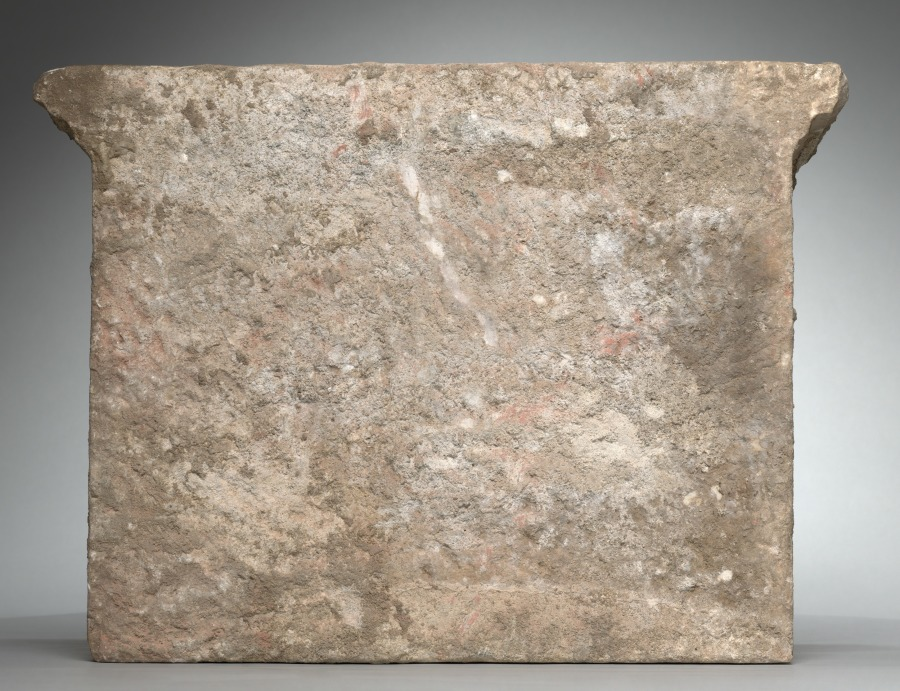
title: Engaged Capital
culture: Southern France, Abbey of Larreule, near Tarbes, 15th century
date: 1400s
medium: limestone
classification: Sculpture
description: This capital belongs to a surviving group including other architectural fragments that once decorated the cloister of the Abbey of Larreule. A cloister was a covered walkway or arcade, usually around all four sides of a square area of grass (the "cloister garth"). The seclusion of the cloister was the monks’ exclusive domain, off limits to others. Here, the monks were supposed to pray, study, meditate, and exercise in privacy and solitude. Such cloister capitals served both to instruct the monks and as a focus for their devotions. Other capitals in this series are installed in the Jardin Massey at Tarbes, near the original abbey. An arch from Larreule has been assembled with other associated French capitals at The Cloisters in New York.